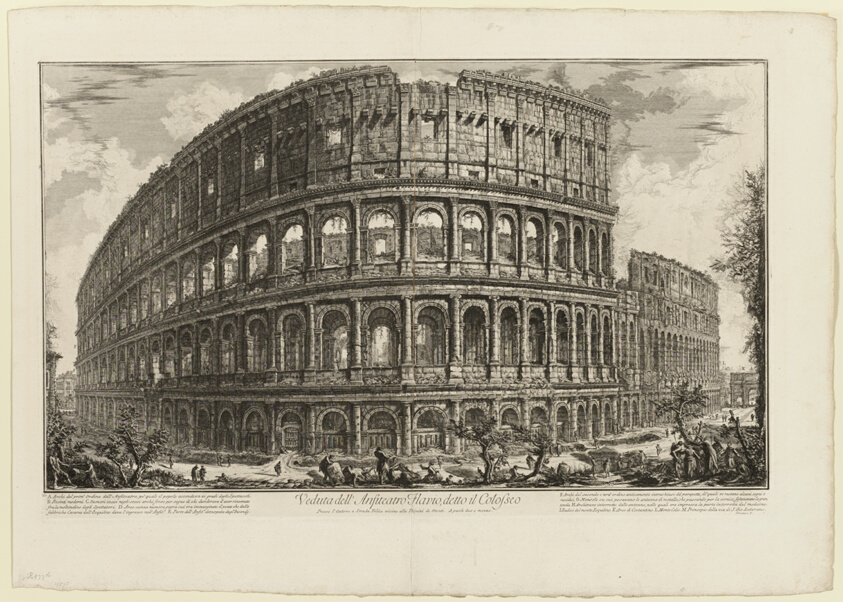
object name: Print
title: View of the Flavian Amphitheater, called the Colosseum, from Views of Rome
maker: Giovanni Battista Piranesi (Italian, 1720-1778)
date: 1750/59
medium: Etching on heavy ivory laid paper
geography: Italy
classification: etching; print; prints and drawing